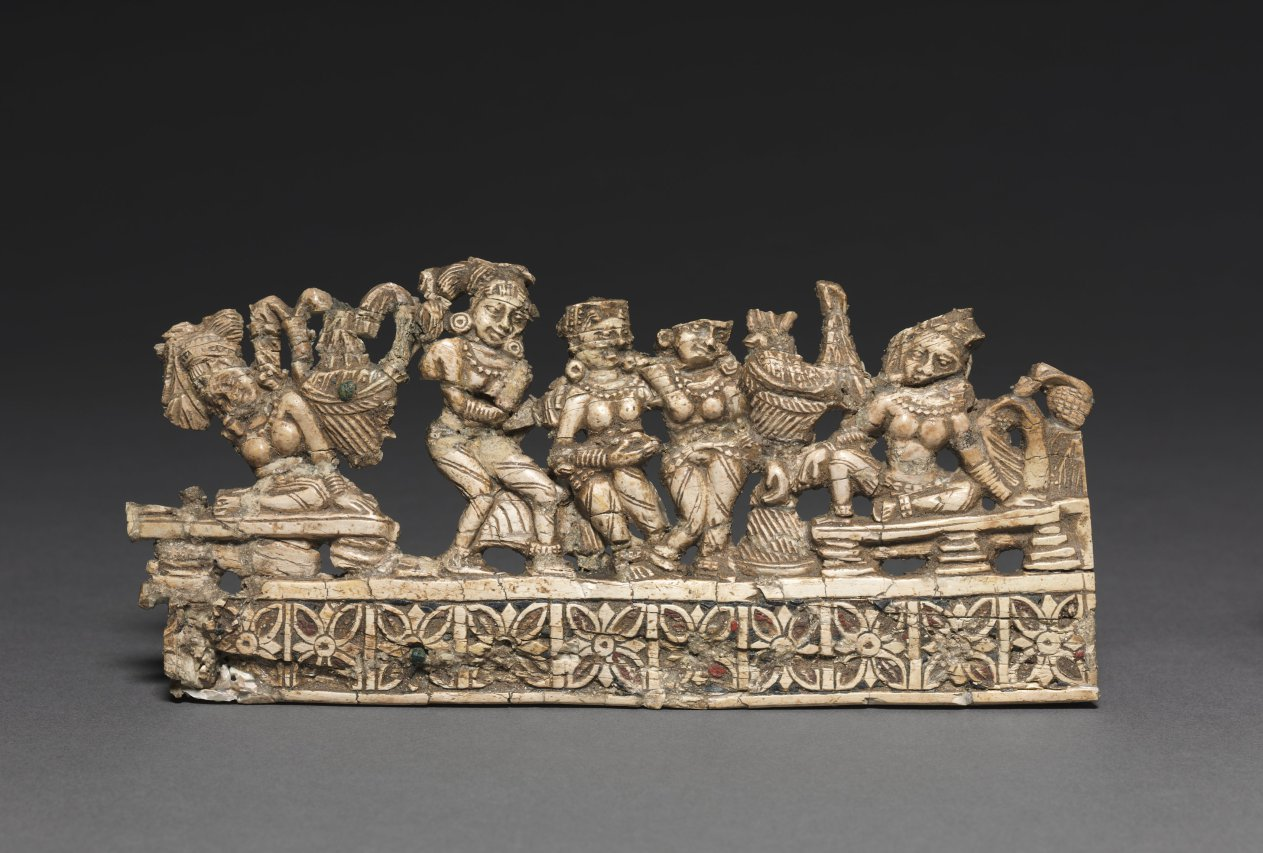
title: Ladies Entertained by Dancers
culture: Afghanistan, Begram, Kushan period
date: 1–200 CE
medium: ivory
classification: Ivory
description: This ivory carving was made to sheath wooden furniture made in India for trade along the Silk Road, which stretched from Rome to China. Indian ivory-faced furnishings--along with lacquer boxes from China and painted glass from Rome--were found in an extraordinary deposit of luxury goods at a site called Begram. The wood on which the ivory and lacquer were affixed has long disintegrated, and only the small pieces remain.